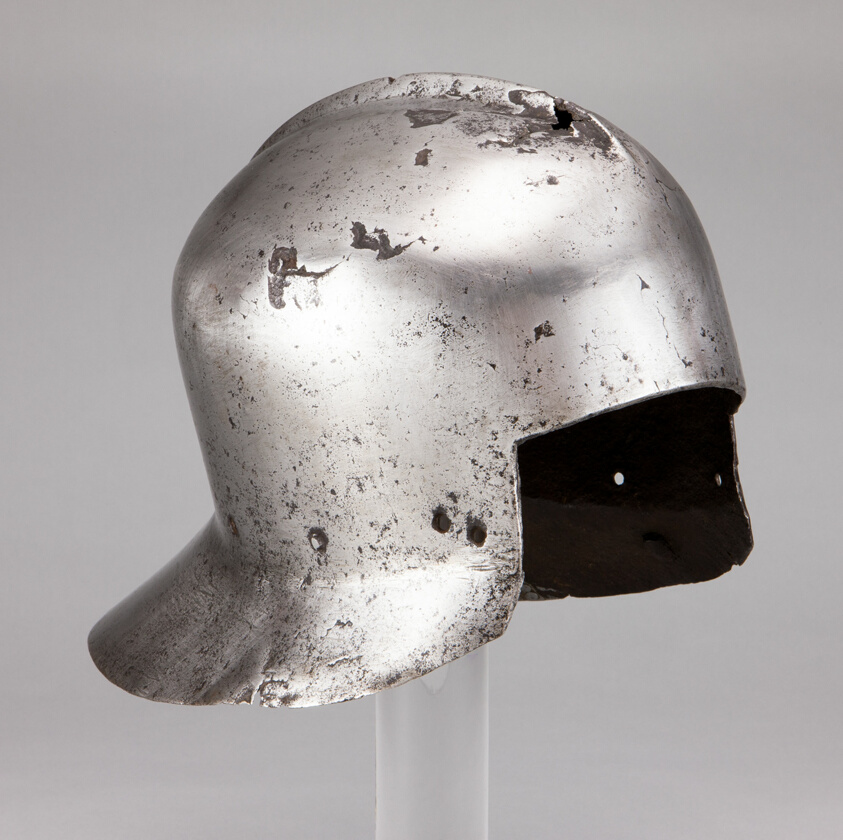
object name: Armor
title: Sallet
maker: Spanish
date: c. 1500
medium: Steel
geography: Spain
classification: suit-helmet; armor; arms and armor